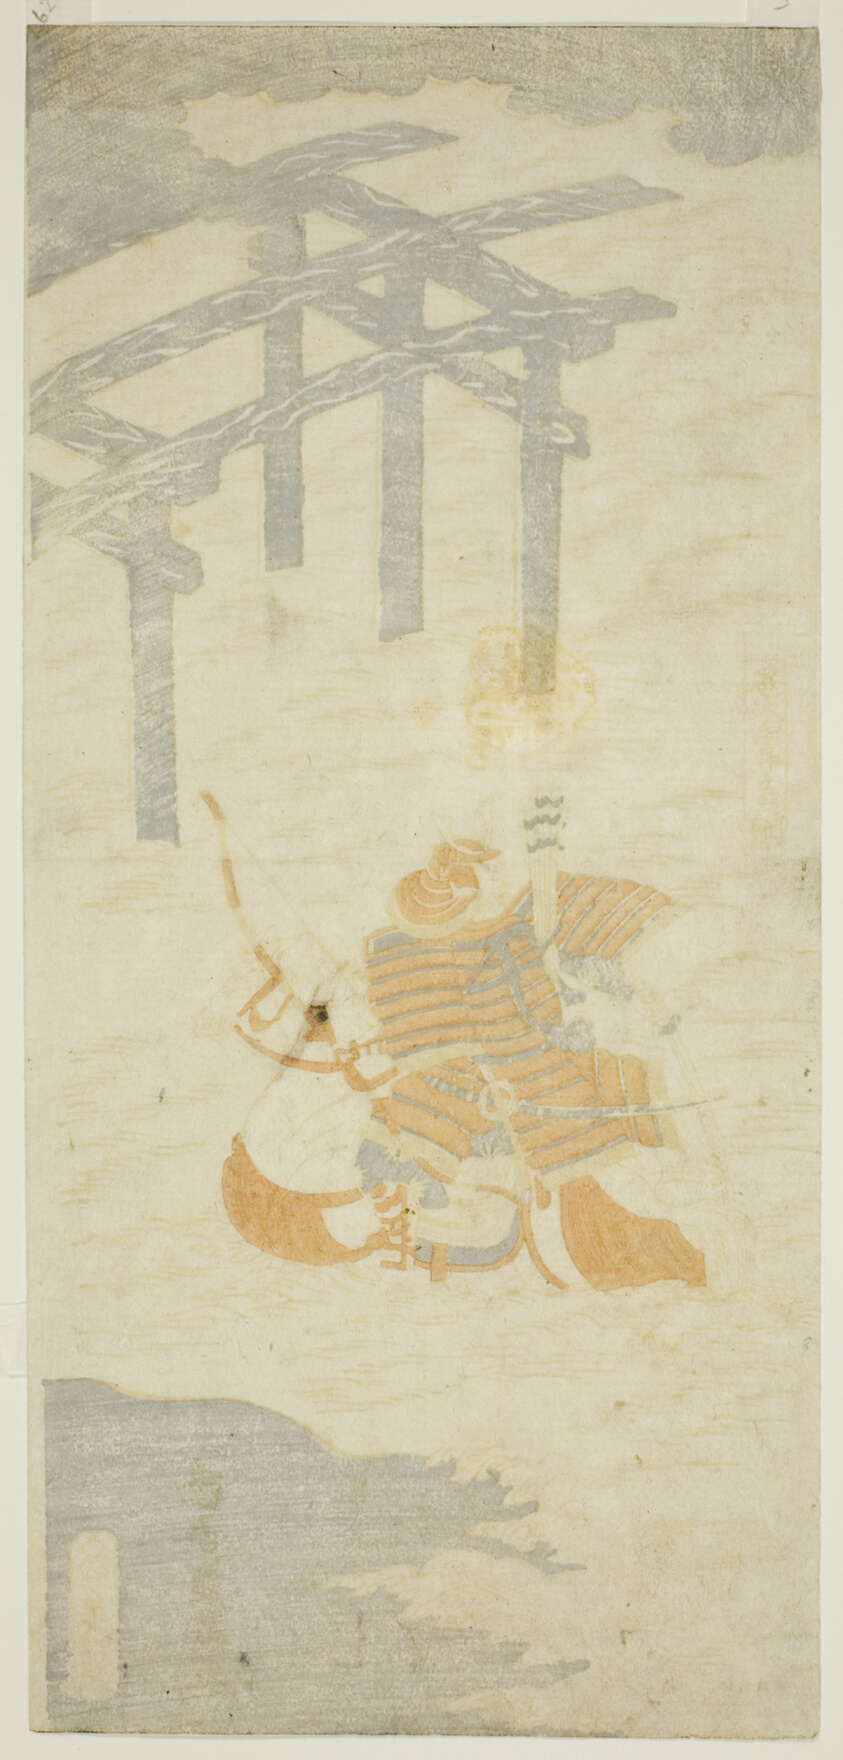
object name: Print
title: The Warrior Sasaki Shiro Takatsuna Crossing the Uji River on Horseback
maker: Torii Kiyomitsu; Japanese, 1735-1785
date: 1760s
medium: Color woodblock print; hosoban, mizu-e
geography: Japan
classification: woodblock print; print; asian art